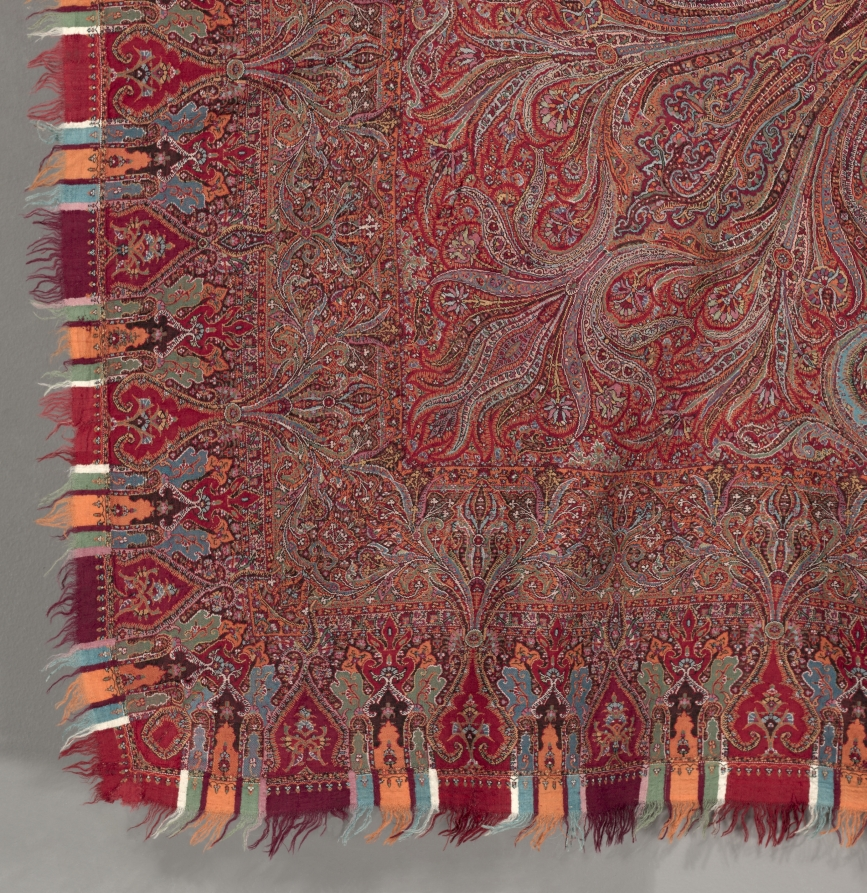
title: Square Multi-Season Pieced Shawl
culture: India, Kashmir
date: 1880s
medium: wool; 2/2 twill tapestry (S), double interlocked, pieced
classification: Textile